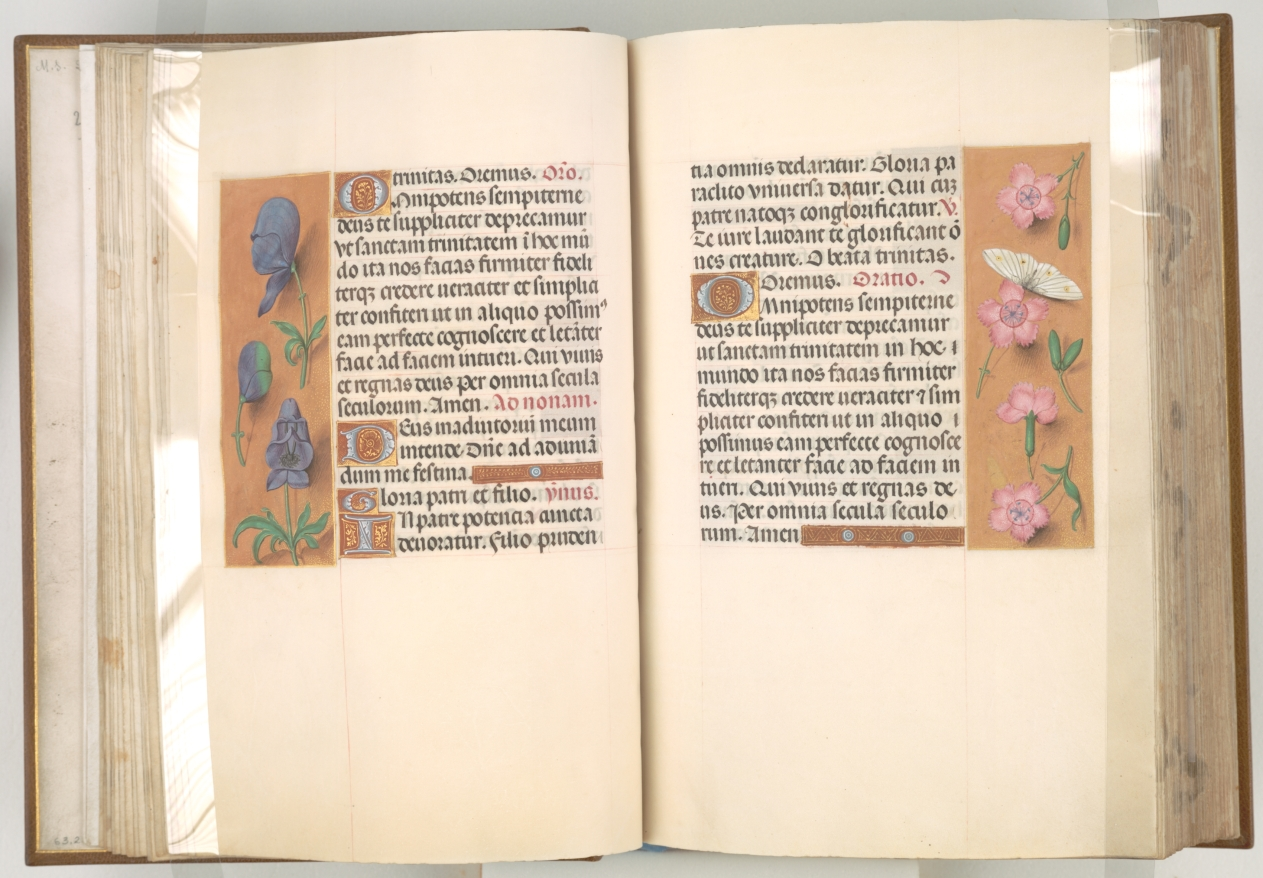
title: Hours of Queen Isabella the Catholic, Queen of Spain: Fol. 20v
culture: Flanders, Ghent and Bruges, late 15th century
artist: Master of the First Prayerbook of Maximillian (Flemish, c. 1444–1519)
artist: and Associates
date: c. 1500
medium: ink, tempera, and gold on vellum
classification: Bound Volume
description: This manuscript was illuminated by a circle of at least five highly organized manuscript painters active in the Flemish cities of Ghent and Bruges. The principal illuminator was Alexander Bening, who painted the majority of the book's miniatures. Manuscripts produced by this circle of artists are renowned for the decoration of their borders, which typically feature a rich variety of realistically-painted flowers, birds, and butterflies. This prayer book, called a book of hours, was intended not for a cleric, but for the private devotions of a lay person-in this case, Isabella the Catholic, Queen of Spain (1451-1504). Isabella's coat of arms embellishes the book's frontispiece. It is unlikely that the book was commissioned by the Queen herself; rather, she probably received it as a diplomatic gift from someone courting her patronage, perhaps Cardinal Francisco Jimenez de Cisneros. A Franciscan friar, Jimenez was dependent upon Isabella for his advancement, first to the post of Queen's confessor in 1492, and then to Archbishop of Toledo in 1495.